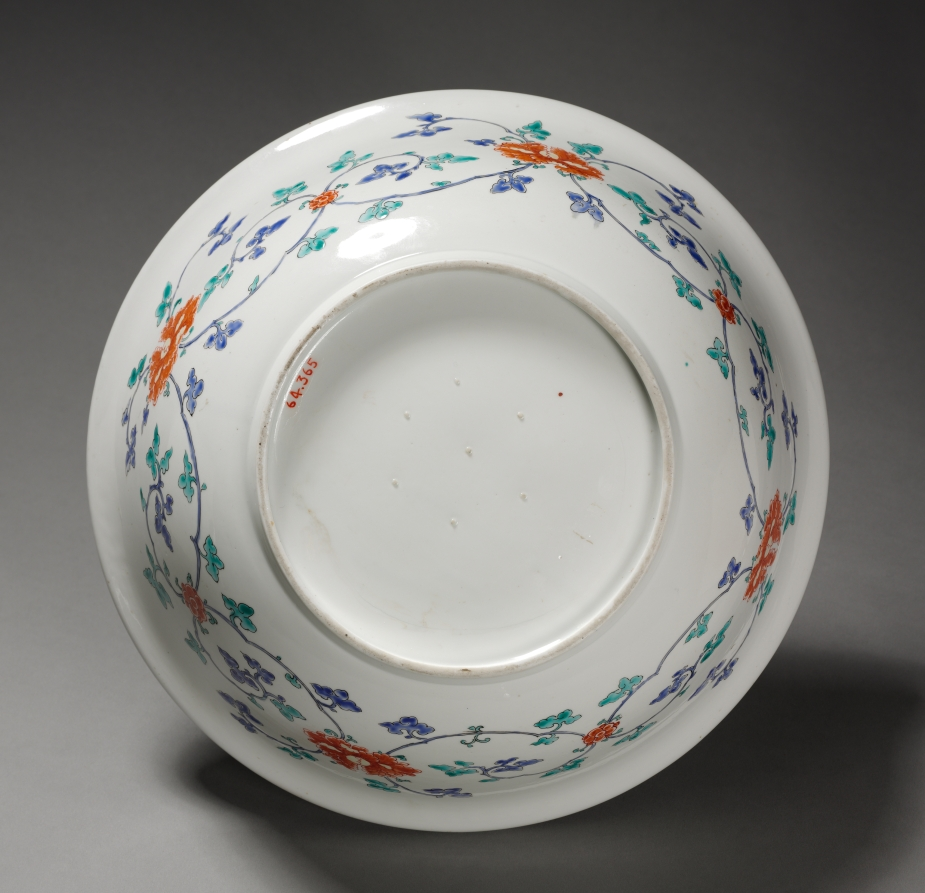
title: Bowl: Kakiemon Ware (2 of 2)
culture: Japan, Edo period (1615–1868)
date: late 1600s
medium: porcelain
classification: Ceramic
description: The Chinese style of decoration identifies this bowl as a product made for the markets in England, Holland, France, and Germany. Here, kakiemon potters rearranged the Chinese literati motifs of the plum, pine, and bamboo. Such kakiemon ware inspired domestic porcelain production in Europe in the 18th and 19th centuries.